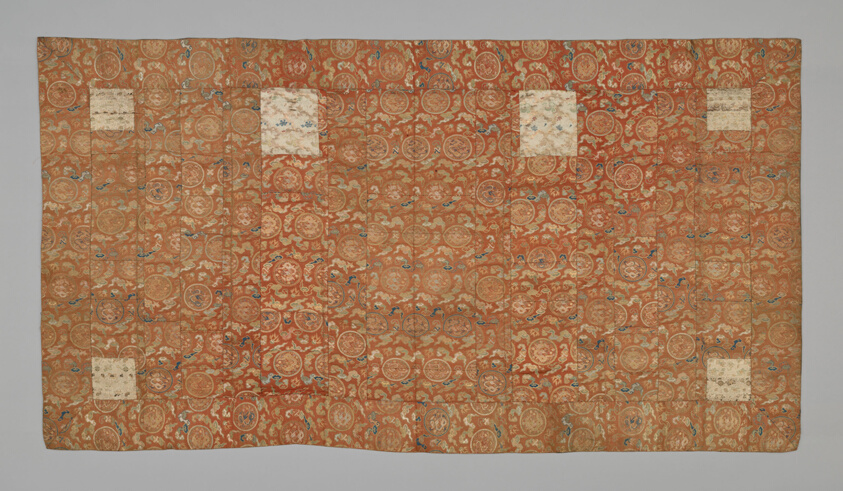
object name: Textile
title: Kesa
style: meiji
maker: Japan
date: Meiji period (1868–1912), late 19th century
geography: Japan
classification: textile; costume; liturgical - buddhist; weaving